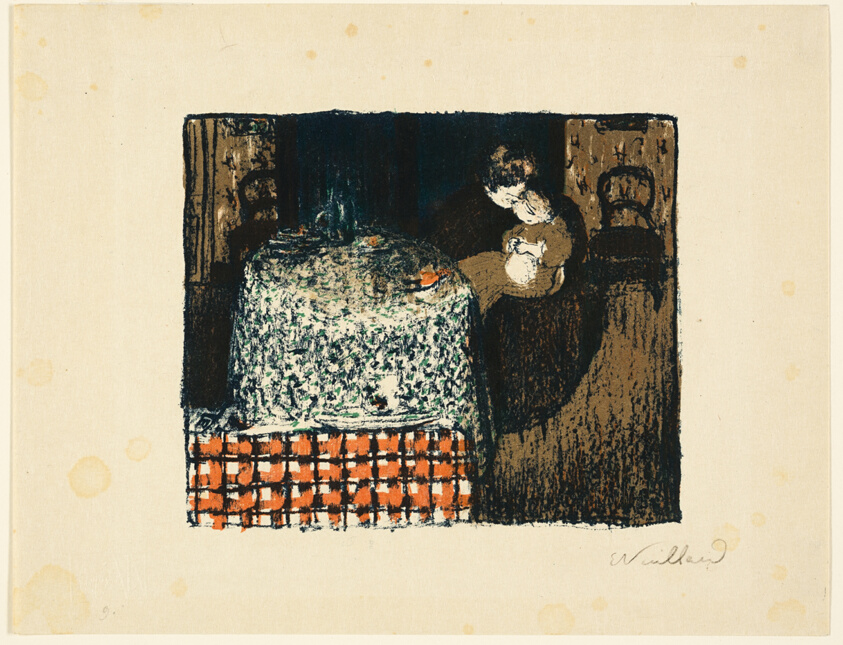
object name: Print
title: Maternity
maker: Edouard Jean Vuillard; French, 1868-1940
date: 1896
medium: Color lithograph on cream Japanese paper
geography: France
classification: lithograph; print; prints and drawing